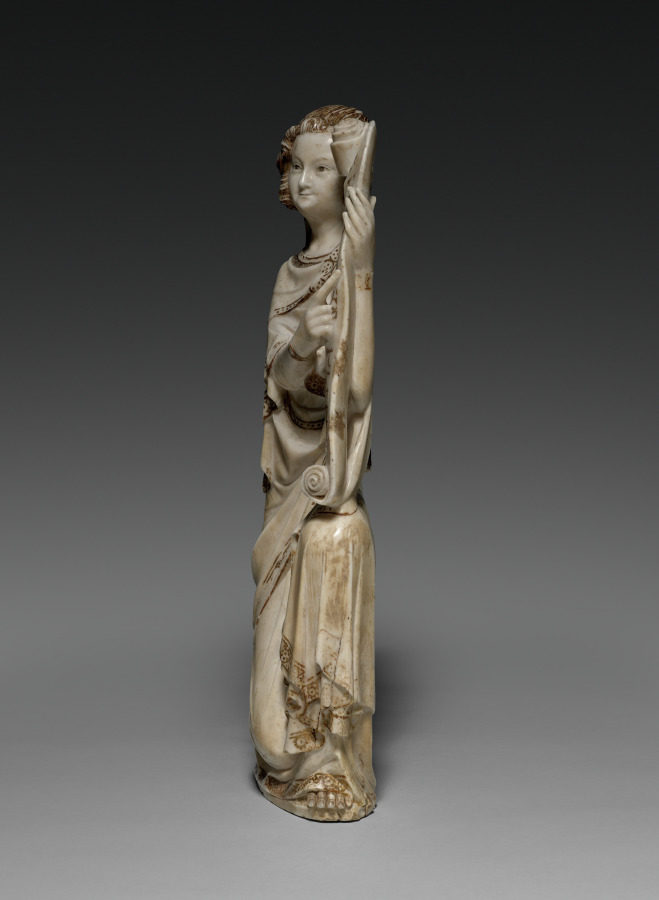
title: The Archangel Gabriel from an Annunciation Group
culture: France, Champagne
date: c. 1350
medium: alabaster with traces of paint and gilding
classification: Sculpture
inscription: Ave Maria, Gratia Plena.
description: In France, the use of alabaster began in the late 1200s for funerary monuments. The Archangel Gabriel, together with its counterpart, the Virgin Mary (now in the Louvre Museum, Paris) is part of an Annunciation. This is a rare example of alabaster sculpture from the 1300s. The alabaster comes from a quarry near Malaucène in Provence (France), making it an instance of long-distance trade of the rare material. Although the figure is very flat, it was likely made to also be viewed from the back, where there are remnants of gilding and the peacock feathers of the angel’s wing.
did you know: The surface of alabaster works can vary. By differentiating the intensity of polishing, it is possible for sculptures to create a surface with varying degrees of luster, or shine.